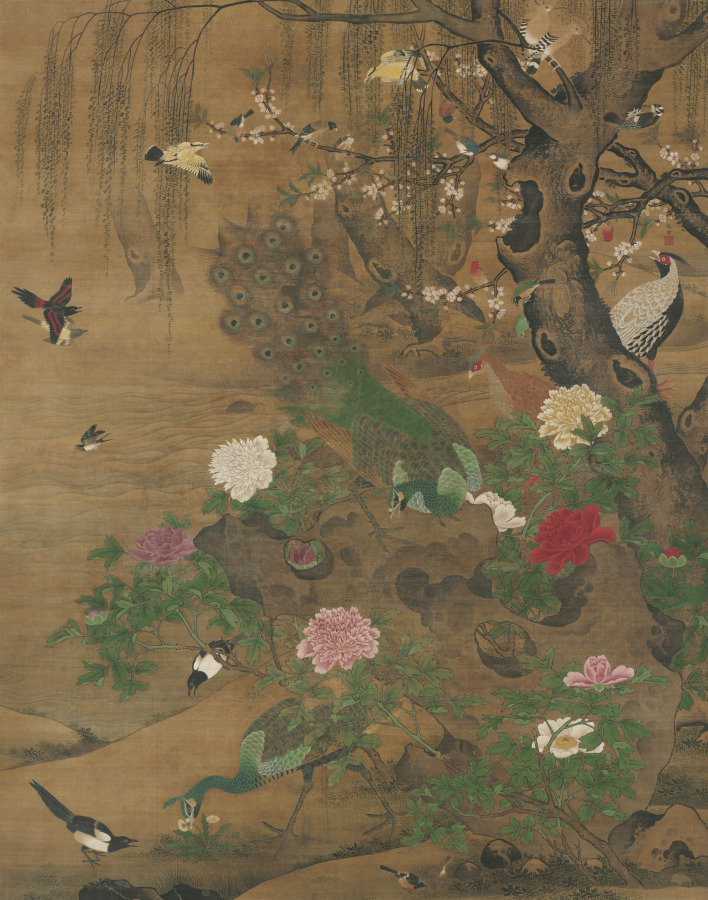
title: Birds Gather under the Spring Willow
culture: China, Ming dynasty (1368–1644)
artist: Yin Hong (Chinese, c. 1430-c. 1500)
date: late 1400s-early 1500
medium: hanging scroll, ink and color on silk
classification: Painting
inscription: 殷宏. [印]金臺世家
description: This scroll depicts a spring scene with all kinds of birds, including one peacock with a hen among peonies. The painting is one of four surviving works by Yin Hong bearing his signature and seals. Some scholars debate whether this work depicts the theme “One Hundred Birds admiring the Phoenix,” a metaphor for human society presenting an idealized hierarchy under imperial rule; other scholars argue that peafowls, as exotic birds not native to China, would not be depicted to represent the emperor. This large painting might have been hung in a palace hall and may have been part of a set depicting the four seasons.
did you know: The peahen is plucking a dandelion.